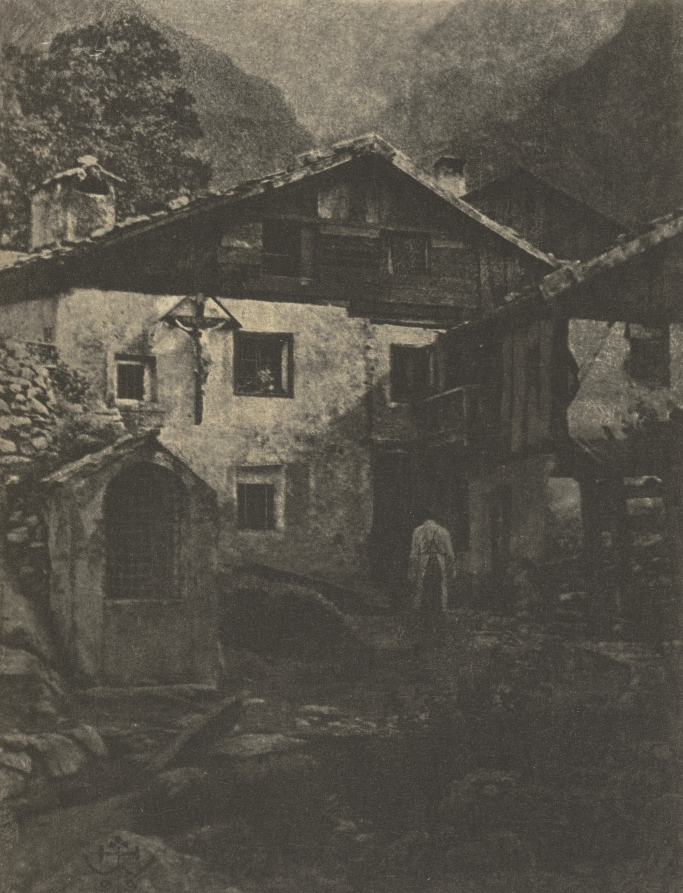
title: Camera Work: A Village Corner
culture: Austria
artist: Hans Watzek (Austrian, 1848–1903)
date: 1906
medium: photogravure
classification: Bound Volume